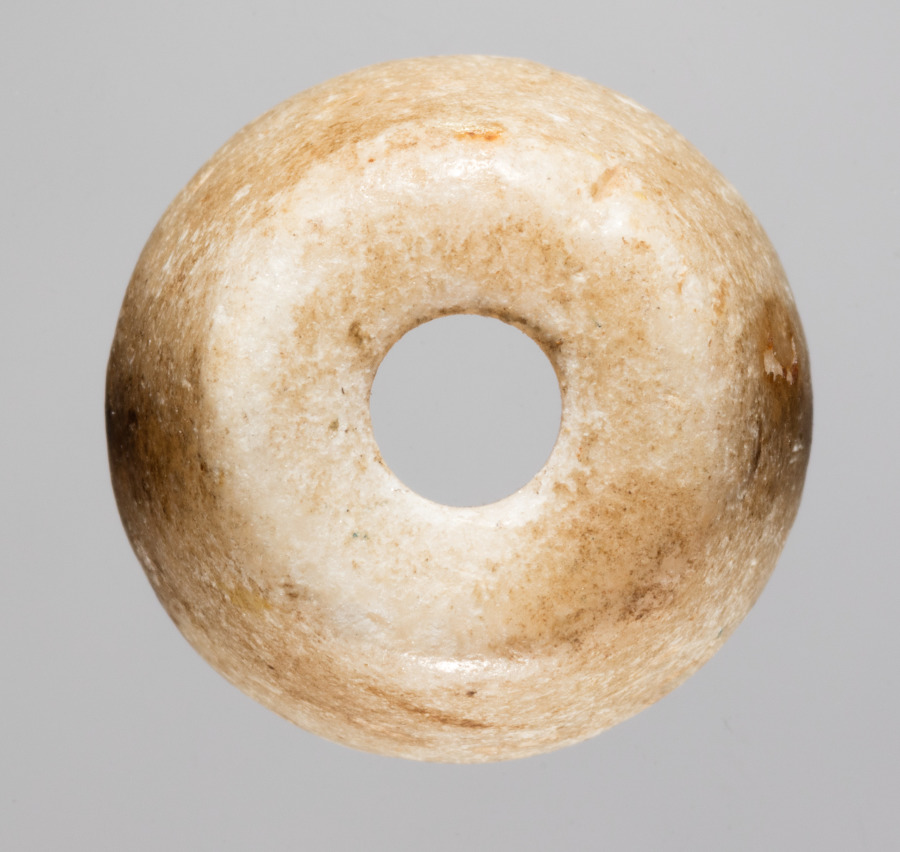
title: Spindle Whorl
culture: Iran, early Islamic period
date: 700s - 900s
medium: bone, incised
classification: Spindle Whorl